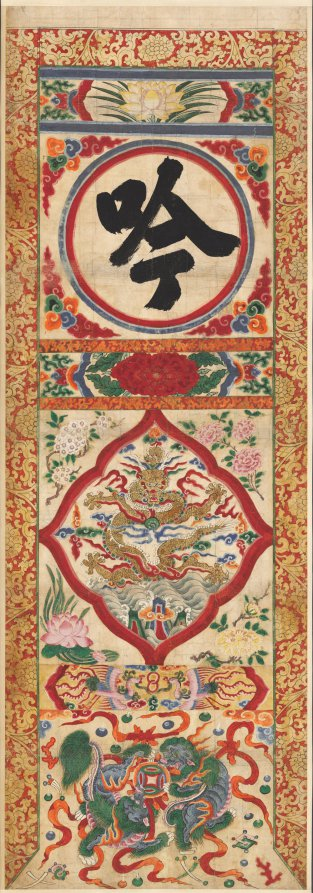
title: Painted Panel of Character "Recite"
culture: Korea, Joseon dynasty (1392–1910)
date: early 1900s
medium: hanging scroll, ink and color on paper; unmounted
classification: Painting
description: This set of four colorful hanging scrolls may have been used in an outdoor Buddhist ritual to evoke heavenly blessings. Each hanging scroll bears four different character; tiger, dragon, whistle, and recite. Traditionally, tiger and dragon belong to the four directional guards, respectively west and east.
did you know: This set of four colorful hanging scrolls may have been used in an outdoor Buddhist ritual to evoke heavenly blessings.